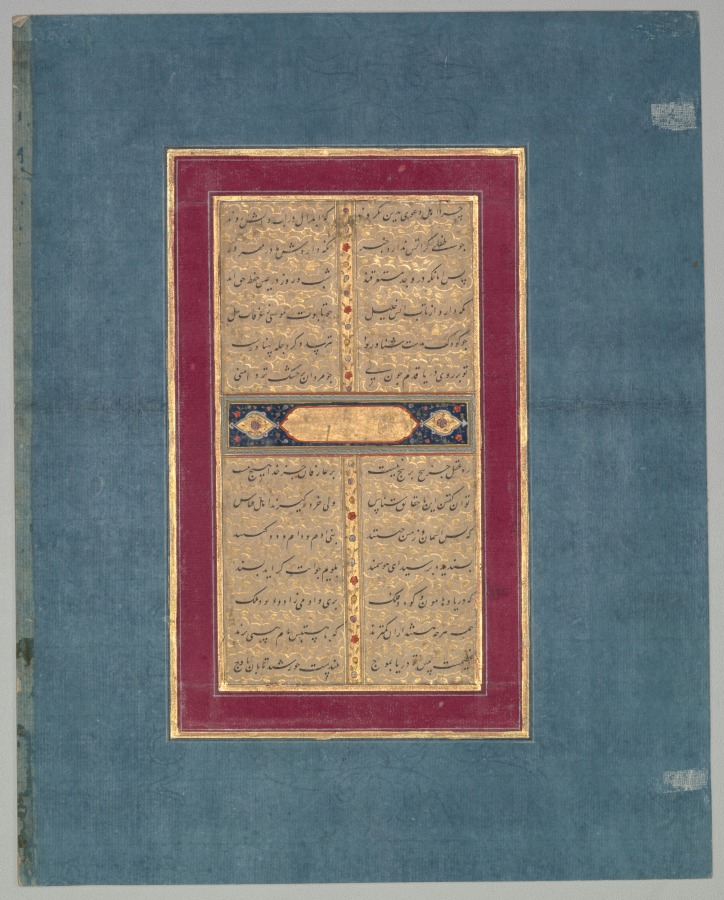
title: Calligraphy: A Page of Text from Sadi's Bustan (verso)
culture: Mughal India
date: c. 1710–20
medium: Gum tempera, ink, and gold on paper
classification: Calligraphy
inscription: Verso: From a Bustan (Fragrant Herb Garden) of Sa‘di (Persian, 1210–1291). Persian text in nasta‘liq script: Why do the adherents of Idea to this not cleave—/ That only the Elect may go in water or in fire?/ As for the infant, uninformed of fire,/ Does not his mother guard him lovingly?/ Those, then, who’re drowned in ecstasy/ By night and day are in the very care of Truth:/ He guards the Friend against the fire’s heat/ As Moses’s crib against the whirlpools of the Nile;/ When an infant’s in a swimmer’s arms/ He knows no fear, broad though the Tigris be;/ But how shall you step on the ocean’s face/ As do real men, when even on dry land your skirt is wet?/ The way of the intellect is all twists and turns,/ But the concern of the gnostics is for God alone!/ This can be said to those who recognize realities,/ Though adherents of analogy may carp thereat and say:/ “What, then, is heaven, and what earth besides?/ Who are the sons of Adam, and the beasts both wild and tame?”/ A proper thing you’ve asked, O prudent one!/ I’ll tell you—if you find the answer proper:/ The plain and the ocean, the mountain and the sky,/ Pari and manchild, demon and angel—/ All, whatsoever they be, are less than That/ By virtue of Whose being they utter being’s name!/ Monstrous before you, with its waves, lies the ocean;/ High is the sun, all ablaze at the zenith; (after Wickens 1974, 113)